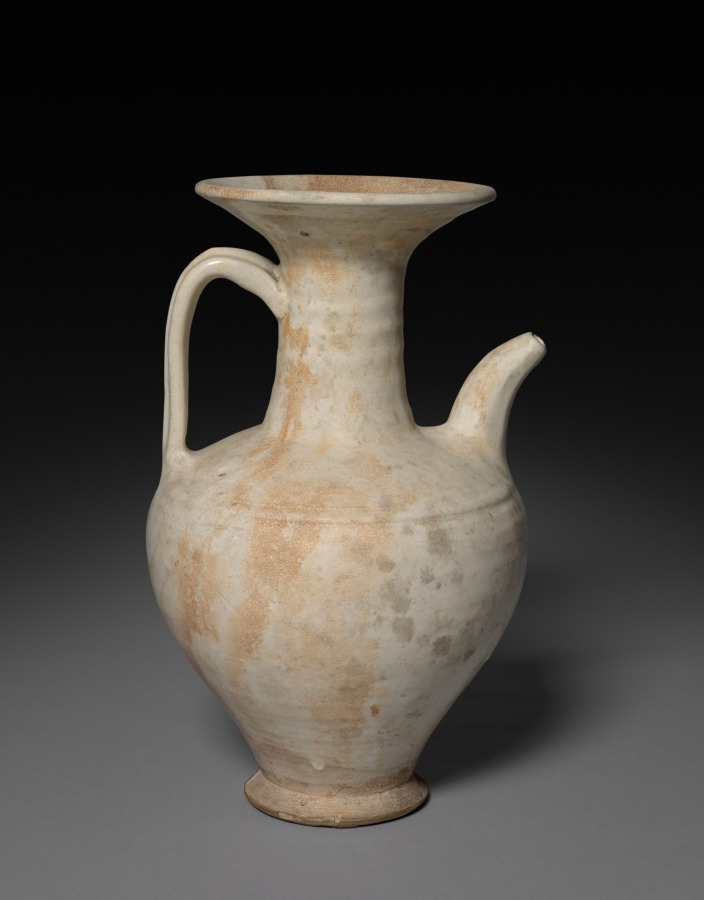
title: Ewer: Cizhou ware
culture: China, Northern Song dynasty (960-1127)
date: 1105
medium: buff stoneware with underglaze slip coating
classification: Ceramic